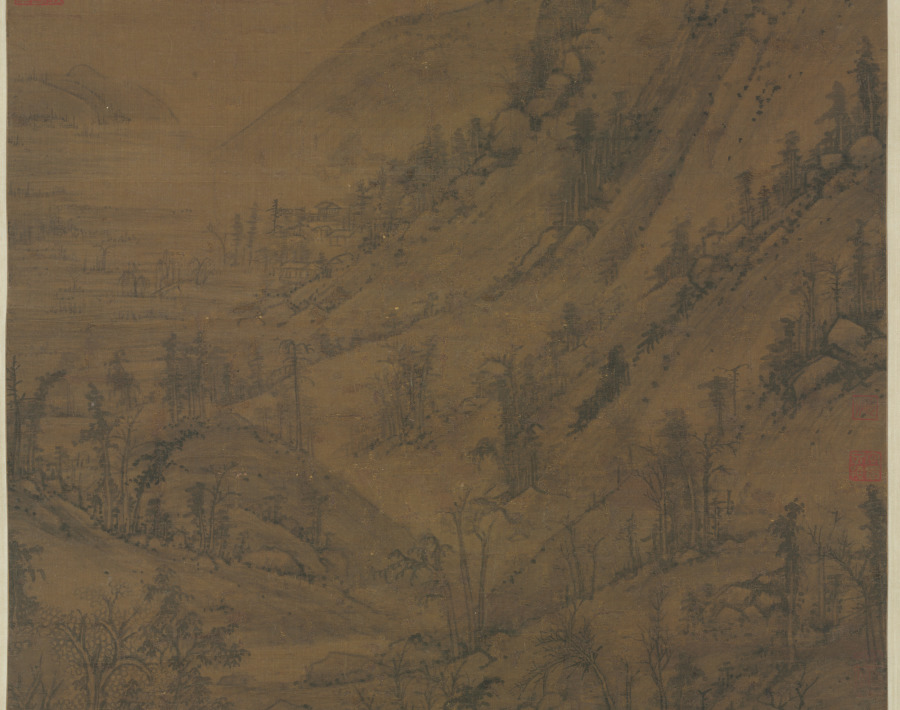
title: Summer Mountains (after Dong Yuan [active c. 937–75])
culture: China, Yuan dynasty (1271-1368)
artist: attributed to Huang Gongwang (Chinese, 1269–1354)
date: 1290–1354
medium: hanging scroll; ink and slight color on silk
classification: Painting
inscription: 【印】一峰道人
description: This monumental landscape is drawn in softly rounded strokes with darker lines frequently applied on top of lighter ones. This technique recalls one of the suggestions included in a collection of the artist's writings known as Secrets of Landscape Painting: The most difficult thing in painting is using the ink. The artist begins by using dilute ink and builds it up to the point where it begins to look right, then uses dense, black ink, applied fairly dry, and washes of deeper-toned ink. This technique distinguishes the fields from the paths, the far from the near. Huang Gongwang may have learned this technique from observing nature through the eyes of an earlier master, Dong Yuan, a painter whose style he shared.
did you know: The wet hills and moist, rich atmosphere evoke the southern Chinese summer, characterized by monsoon rains and lush growth.